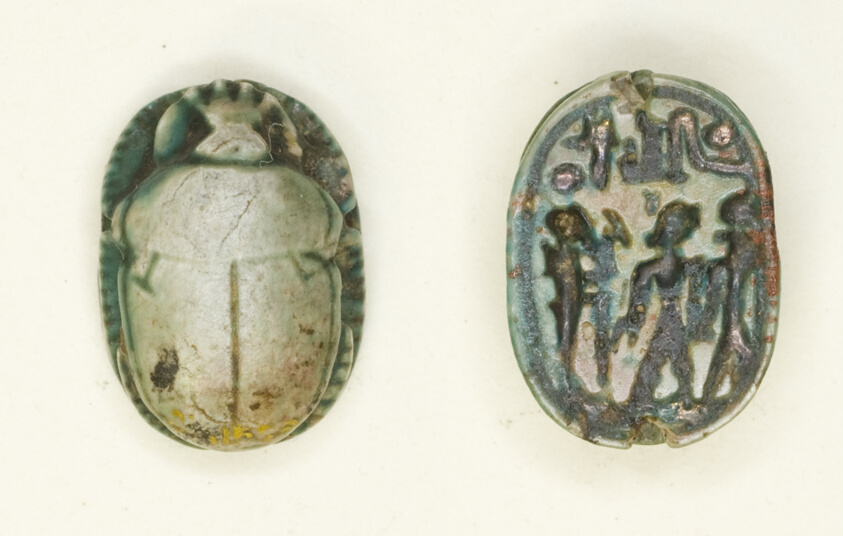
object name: Costume and Accessories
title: Scarab: The God Ptah with a Standing King and the Name of Usermaatra Setepenra (Ramesses II)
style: new kingdom, twentieth dynasty, egyptian, ancient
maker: Egyptian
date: New Kingdom, Dynasty 19, Reign of Ramesses II (about 1279–1213 BCE)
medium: Glazed steatite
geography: Egypt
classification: scarab; ancient art; costume; amulet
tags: scarab beetle, gods (deities), Hieroglyphs, king, pharaohs